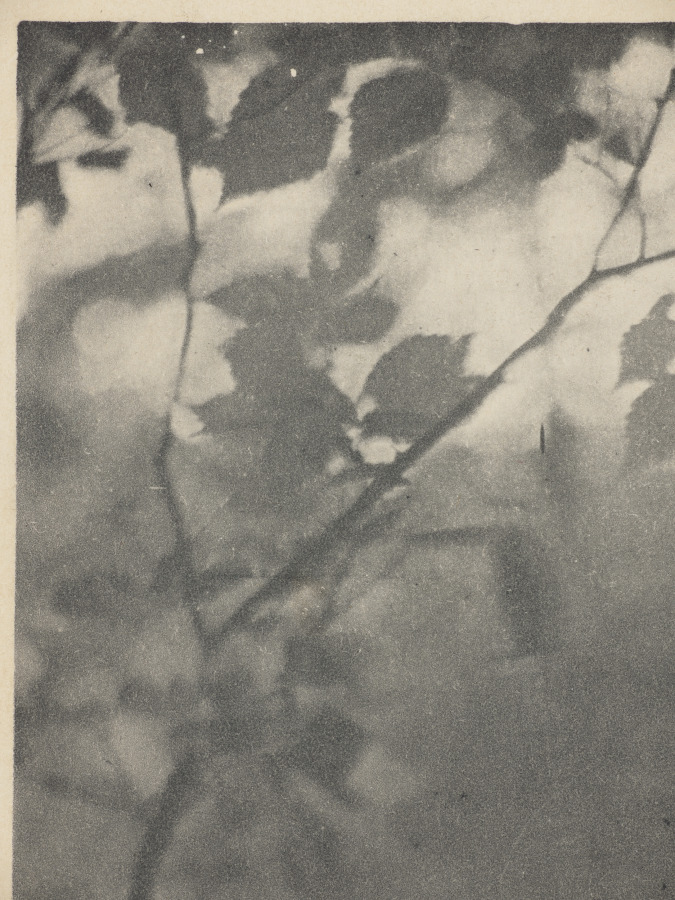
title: The Edge of the Wood - Evening (Letitia Felix)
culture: America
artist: Clarence H. White (American, 1871–1925)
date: 1900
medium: photogravure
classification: Photograph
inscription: Written in pencil on recto: "Clarence H. White [signed] '00"; in pencil on verso: " 'The Edge of the Wood-Evening'- / Clarence H. White"; in pen on verso: "Letitia Felix"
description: Clarence H. White experimented with an array of artistic media that blurred the lines between photography, drawing, and printmaking. Here are two examples of that experimentation: a platinum print on the left and a photogravure on the right. White was likely drawn to both processes for their broad tonal range and interaction of image and paper. To create platinum prints, a light-sensitive liquid emulsion is applied to and absorbed by the paper. The image forms within the paper’s fibers, resulting in a matte appearance. Because photogravures are printed like an etching, the image is formed with ink impressed onto the paper’s surface.